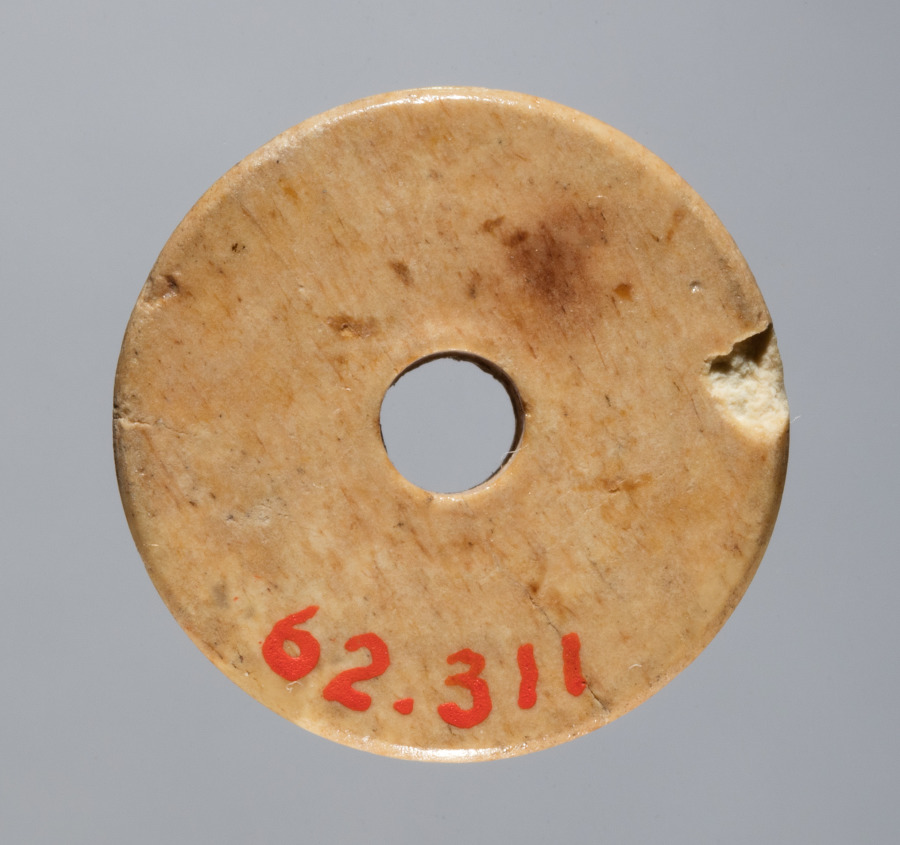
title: Spindle Whorl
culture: Iran, early Islamic period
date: 700s - 900s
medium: bone, incised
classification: Spindle Whorl